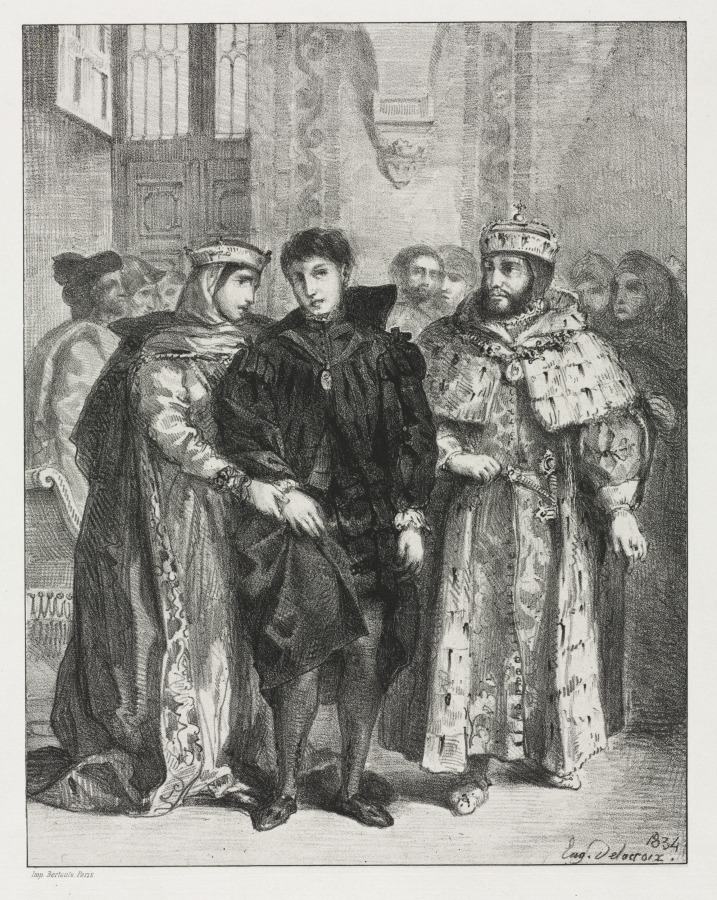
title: Hamlet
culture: France, 19th century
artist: Eugène Delacroix (French, 1798–1863)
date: 1834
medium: lithograph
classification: Print